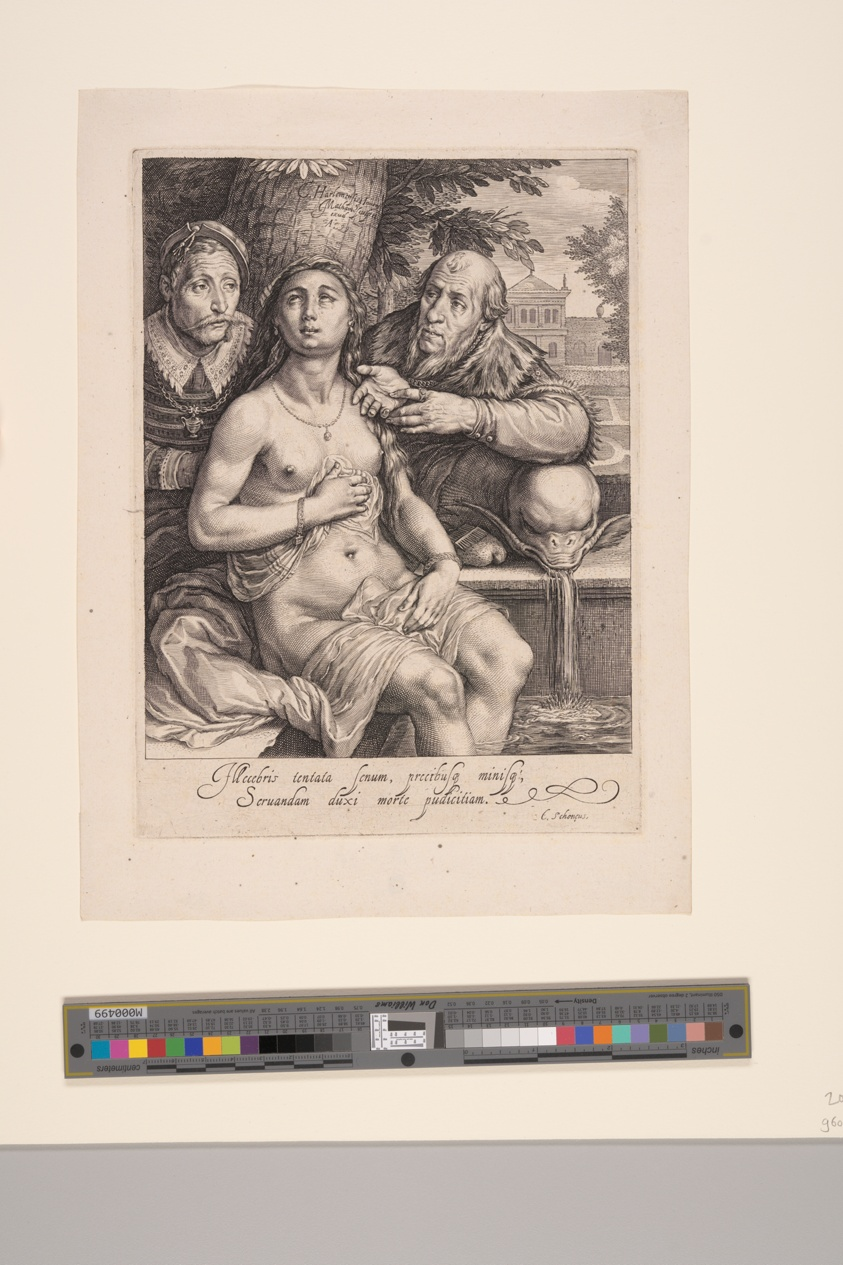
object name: Print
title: Susanna and the Elders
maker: Jacob Matham (Dutch, 1571–1631); after Cornelis van Haarlem (Dutch, 1562-1638)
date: 1599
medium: Engraving on laid paper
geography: Netherlands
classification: print; engraving; paper; prints and drawing